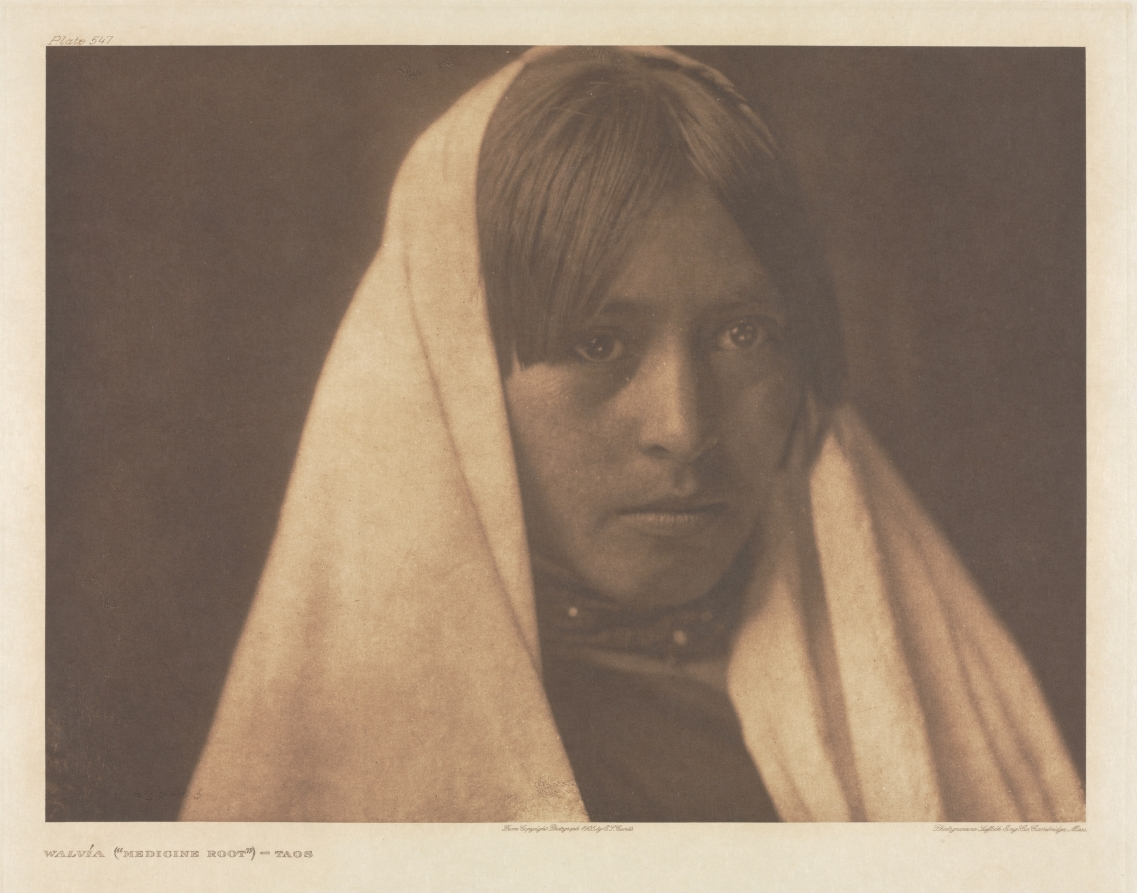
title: Portfolio XVI, Plate 547: Walvía ("Medicine Root") - Taos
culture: America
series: The North American Indian: being a series of Portfolios picturing and describing the Indians of the United States, the Dominion of Canada, and Alaska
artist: Edward S. Curtis (American, 1868–1952)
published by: The University Press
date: 1905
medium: photogravure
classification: Portfolio